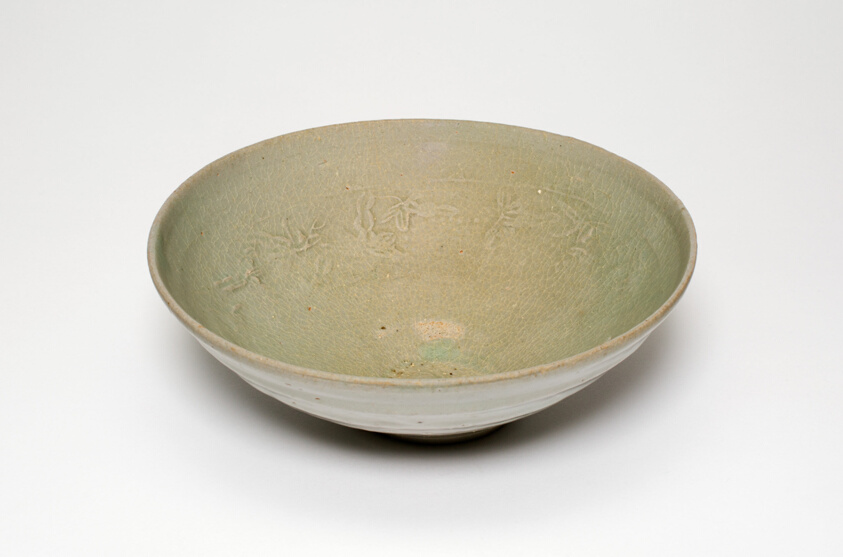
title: Bowl with Floral Design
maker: Korea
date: Goryeo dynasty (918–1392)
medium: Celadon-glazed stoneware with underglaze molded decoration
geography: Korea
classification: porcelain; ceramics; asian art